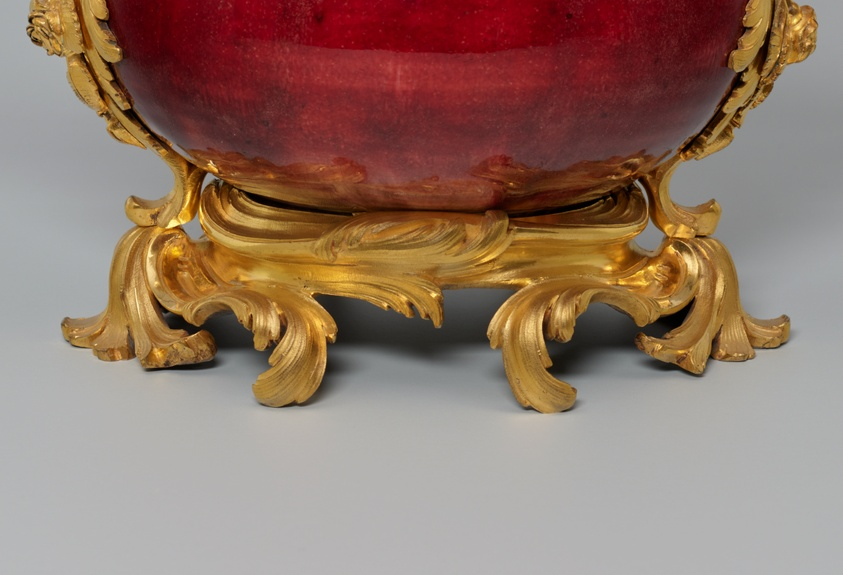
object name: Ceramics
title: Pair of Mounted Vases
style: Rococo, 18th Century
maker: China; Mounts attributed to Jean-Claude Duplessis (French, c. 1695–1774)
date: c. 1750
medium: Hard paste porcelain and gilt bronze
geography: China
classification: vase; france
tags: ormolu, China, foliage